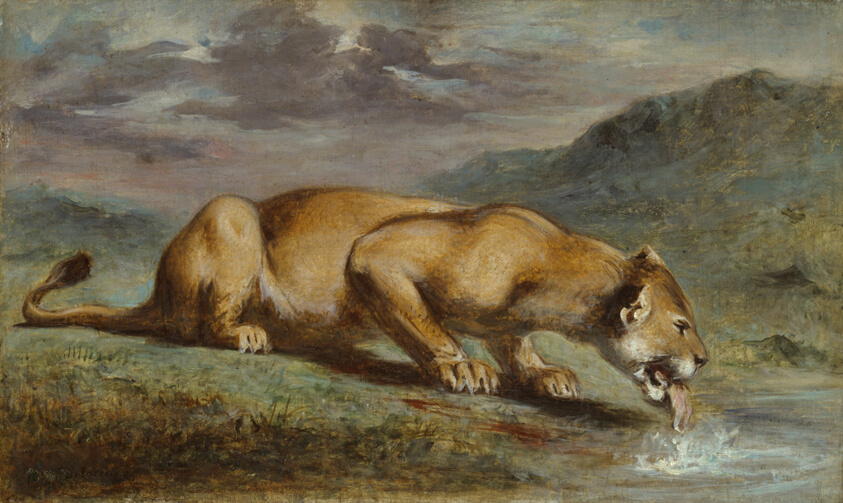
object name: Painting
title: Wounded Lioness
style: 19th century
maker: Pierre Andrieu (French, 1821-1892)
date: 1840/50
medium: Oil on canvas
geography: France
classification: oil on canvas; french; paint; painting; european painting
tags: animals, landscape, clouds, sky, river, mountain